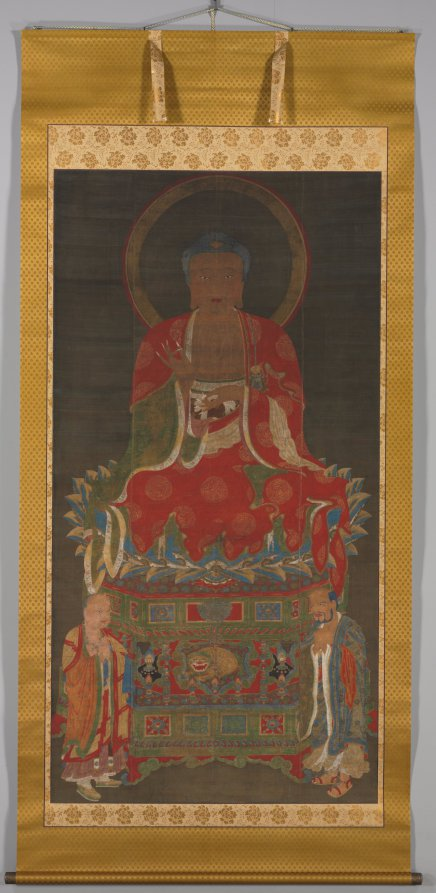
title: Shakyamuni with two attendants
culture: China, Yuan (1271-1368) or early Ming dynasty (1368-1644)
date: 1300s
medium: Hanging scroll; ink, color, and gold on silk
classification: Painting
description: The historic Buddha Shakyamuni is seated on an elaborately decorated pedestal and flanked by two attendants making gestures of devotion. The unknown artist used gold and deeply hued pigments to depict the luxurious fabrics, particularly the golden medallions of swirling dragons and clouds on the Buddha’s red robe. The painting itself is mounted in a Buddhist style with two tiers of fine silk borders. The inner border of gold brocade on a cream background surrounds the painting. The outer border is yellow silk; decorative silk strips, called futai, dangle from the top hanging bar.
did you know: This painting was made on 3 vertical panels of silk stitched together. The joins are visible just outside of Shakyamuni's left and right shoulders.